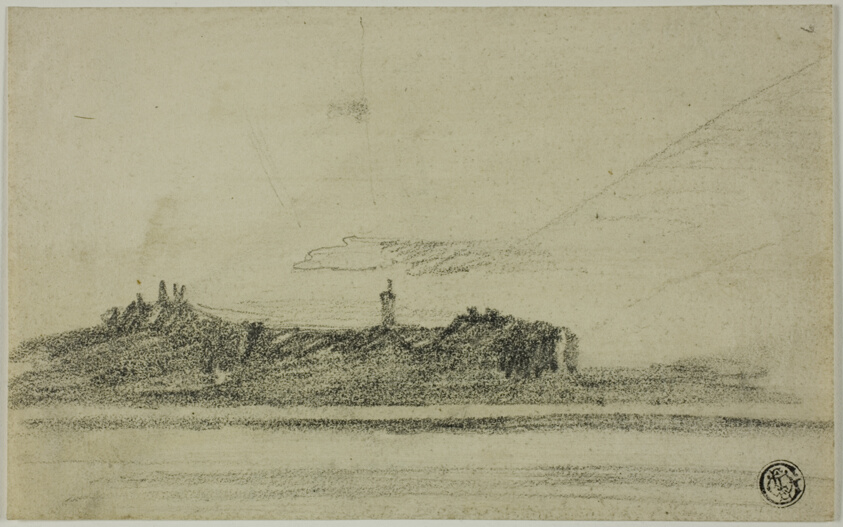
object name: Drawing and Watercolor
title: Castle on Shore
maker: Attributed to Thomas Girtin; English, 1775-1802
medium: Graphite on cream wove paper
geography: England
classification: graphite; drawings (visual works); prints and drawing